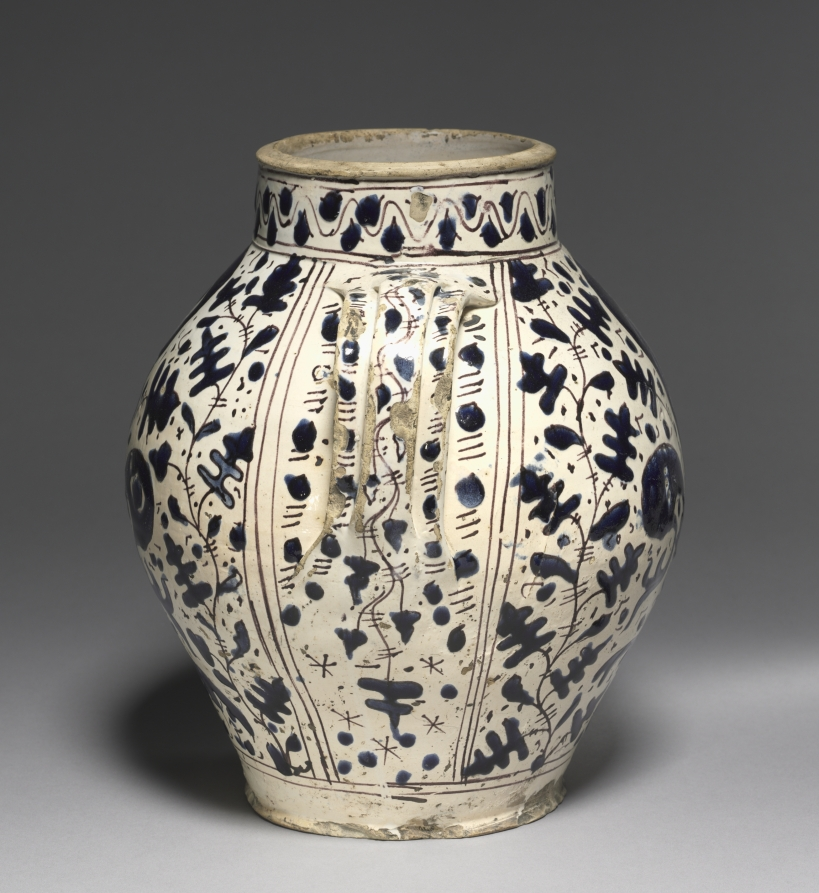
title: Two-Handled "Oak Leaf" Pharmacy Jar with Fleur-de-Lys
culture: Italy, Florence, 15th century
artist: workshop of Giunta di Tugio (Italian, c. 1382–1450)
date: c. 1430–1450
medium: tin-glazed earthenware (maiolica)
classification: Ceramic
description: Giunta di Tugio was the most important maiolica ceramist of his time in Florence. Di Tugio was trained in his father's workshop, which he took over following his father's death around 1419, managing it for the next thirty years. According to documents, by 1417 di Tugio was a member of the council of oliandoli, or oil merchants.